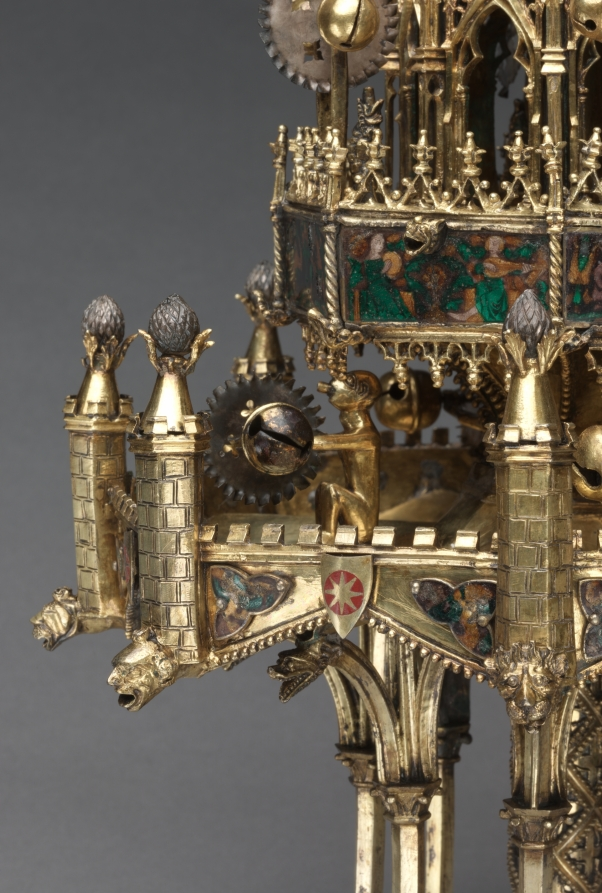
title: Table Fountain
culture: France, Paris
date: c. 1320–40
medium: gilt-silver and translucent enamels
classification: Metalwork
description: Conceptually and stylistically, this object is beyond all else a piece of Gothic architecture in miniature with vaults, pinnacles, columns, and traceried arches. Though the artist who created it is unknown, he was unquestionably inspired by the great Gothic buildings of his time. The table fountain is a three-tiered assembly combining cast elements with bent sheets of gilt-silver. To these have been attached a series of enamel plaques representing grotesque figures, some of which play musical instruments. Water wheels and bells were added to capture motion and sound. The rich detail, precious materials, and involved ornamentation of this deluxe object suggest it would have been expensive to produce and highly treasured by its original owner, someone of high status, and would have been deployed as an object of spectacle. This is the most complete example of its type known to survive from the Middle Ages. Medieval inventories reveal that small fountains like this, often taking various forms, and generally made from precious metals, once existed in large numbers, thus making the Cleveland table fountain an extremely rare object.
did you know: This fountain with its minute architectural details and finely made enamel plaques displayed the wealth and refinement of the owner as it entertained his guests. Imagine hearing the ringing of the tiny bells when this fountain was in use.